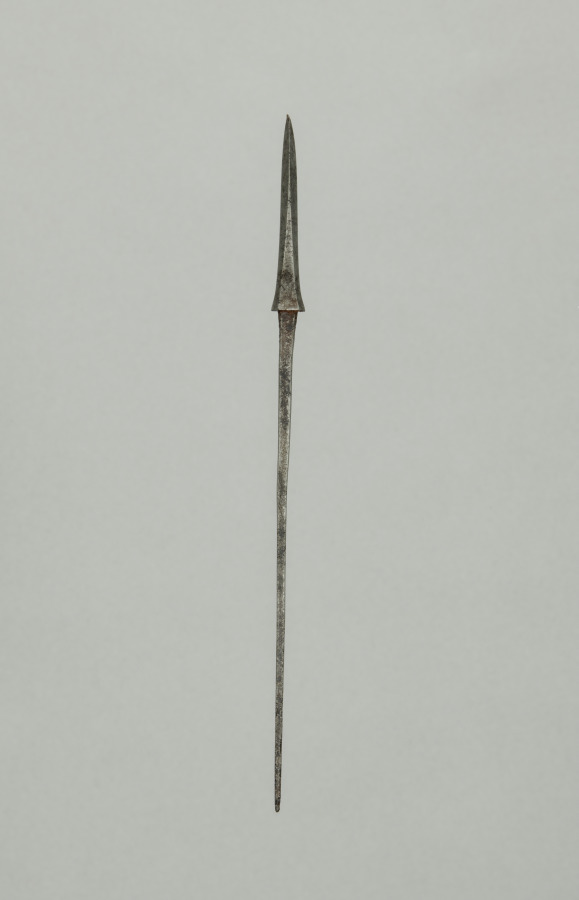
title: Arrow Point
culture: Japan, Edo period (1615–1868)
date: 1700s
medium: steel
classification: Arms and Armor